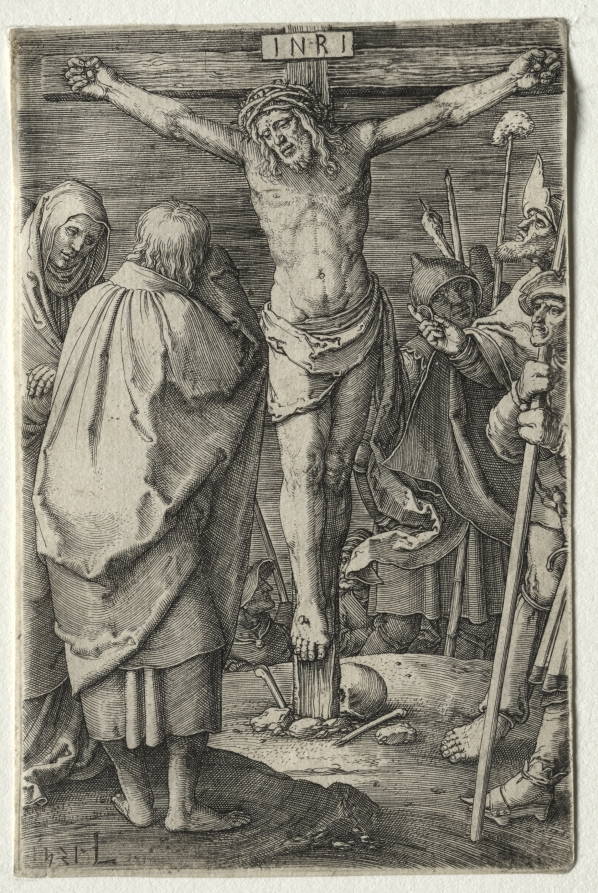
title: The Passion: The Crucifixion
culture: Netherlands, 16th century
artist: Lucas van Leyden (Netherlandish, 1494–about 1533)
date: 1521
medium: engraving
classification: Print